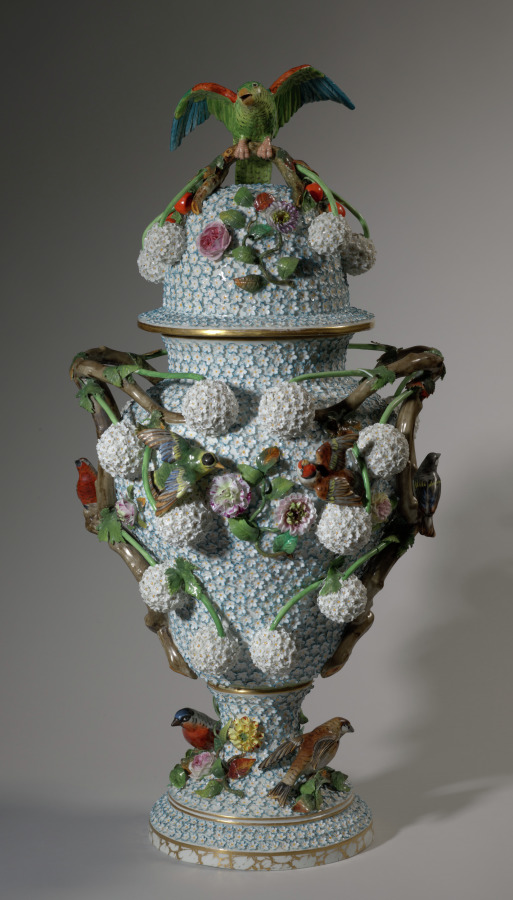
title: Vase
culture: Germany, 19th century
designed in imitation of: Meissen Porcelain Factory (German, est. c. 1710)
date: 1850–1899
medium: porcelain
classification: Ceramic